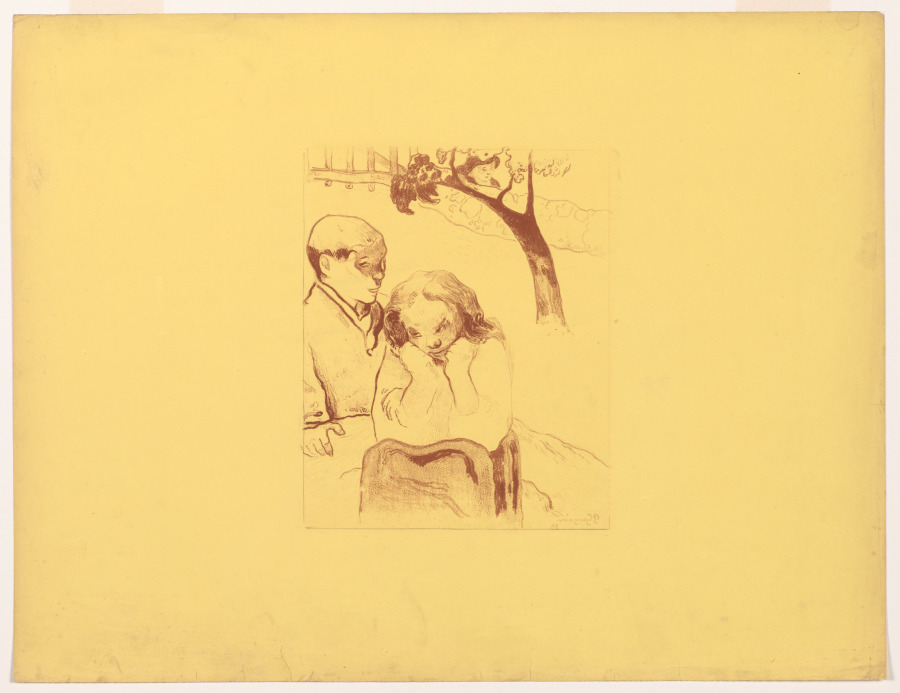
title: Volpini Suite: Human Misery (Misères Humaines)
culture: France, 19th century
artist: Paul Gauguin (French, 1848–1903)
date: 1889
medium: zincograph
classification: Print